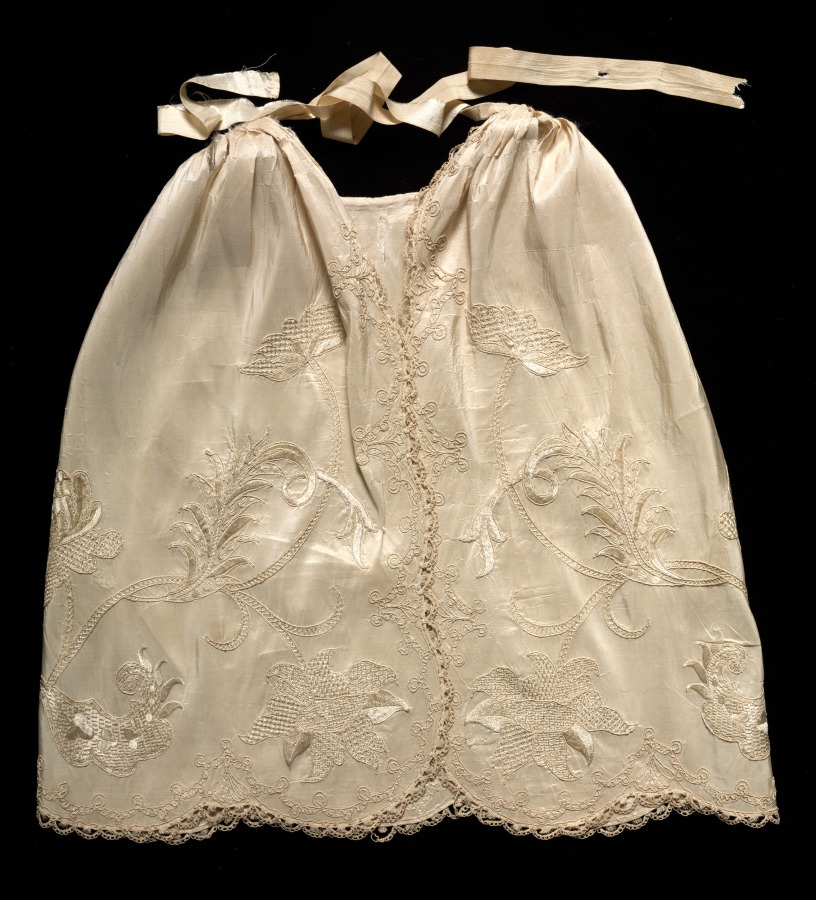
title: Embroidered Taffeta Apron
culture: England, 18th century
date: 1700s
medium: embroidery, silk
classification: Embroidery